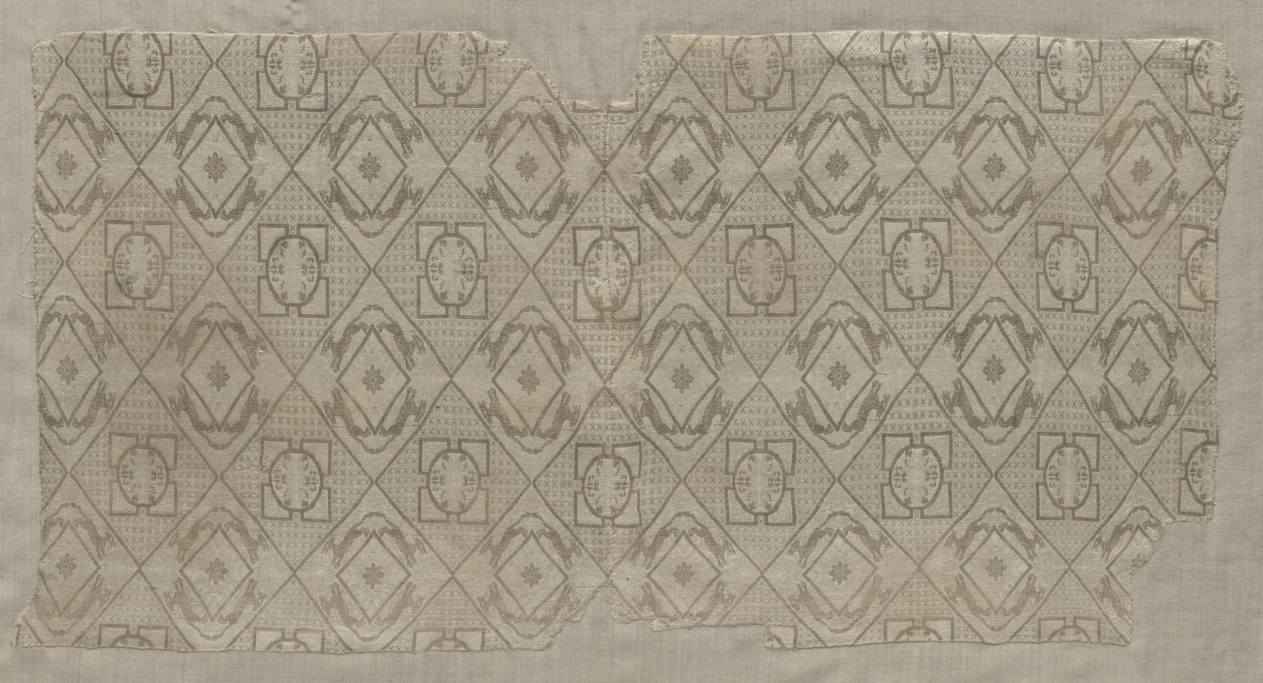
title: Fragment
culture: Iraq or Iran, in the style of the Buyid period (945–1055)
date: before 1968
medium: Silk: lampas weave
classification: Textile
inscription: al-qudrah